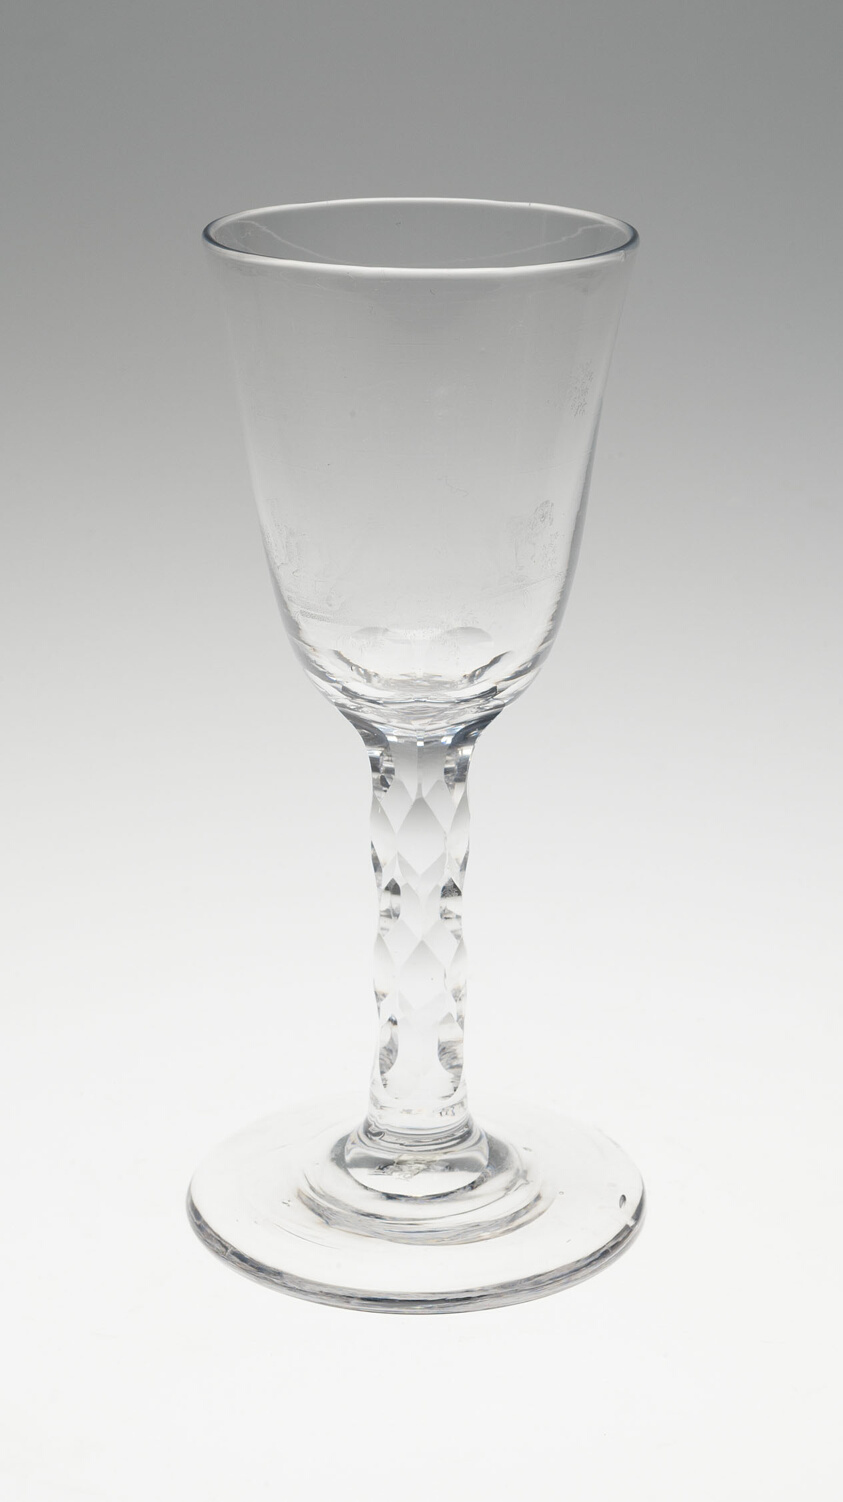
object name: Glass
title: Wine Glass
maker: England or Netherlands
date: c. 1760/80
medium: Glass; stipple engraved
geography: England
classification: drinking vessel; glass; european decorative arts